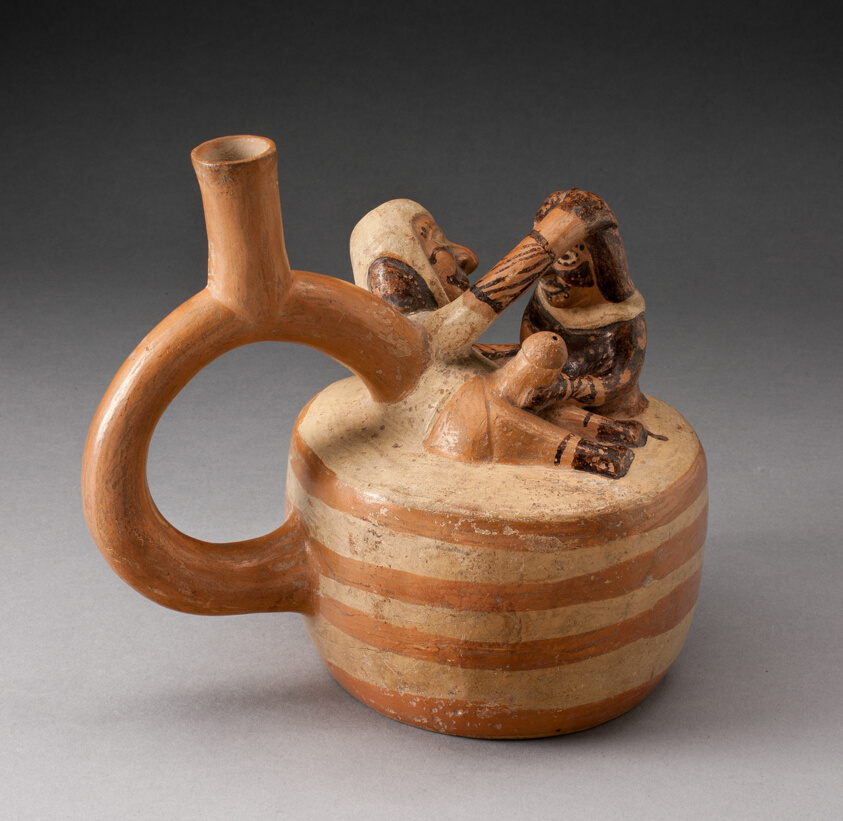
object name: Vessel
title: Handle Spout Vessel Depicting Masturbation Scene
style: moche, mochica, early intermediate period, Pre-Columbian, americas, Arts of the Americas, andean, andes, south american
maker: Moche (North coast, Peru)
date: 100 BCE–500 CE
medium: Ceramic and pigment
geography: Peruvian North Coast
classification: earthenware; ceramics; vessel; art of the americas